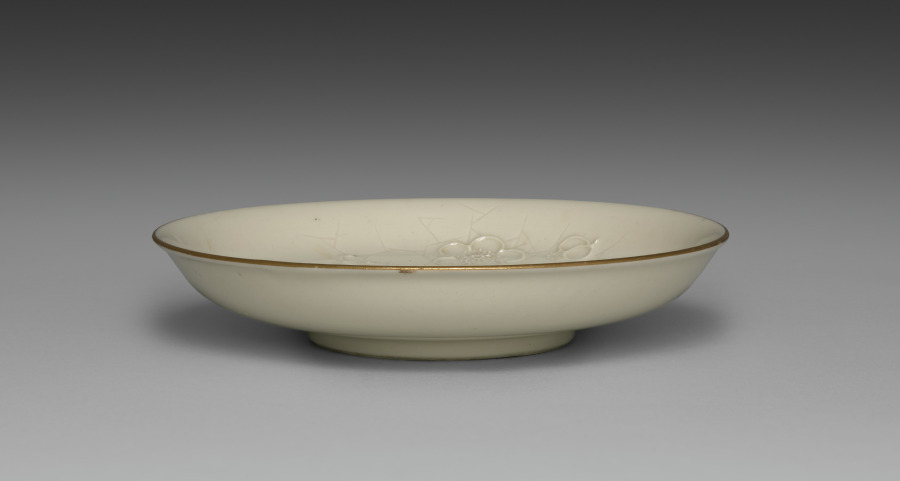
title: Medium-sized Dish from Dining Set with Plum Blossoms and Cracked-Ice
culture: Japan, Meiji period (1868–1912)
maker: Seifū Yohei II (Japanese, 1844–1878)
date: c. 1875–78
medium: Porcelain with molded designs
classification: Ceramic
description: Each item in this set has a delicate low-relief design of flowering plum branches over scattered, intersecting lines meant to resemble the cracked-ice surface of a frozen body of water and is signed on the base in gold pigment. While Yohei II produced many fine works in underglaze blue, like those produced by Kiyomizu Shichibei, he also made works in quite different styles later in his career, from the early 1870 s. In 1873, he was appointed purveyor to the Industrial Center of Kyoto Prefecture, a designation associated with Kyoto’s efforts to reach an international market through the port of Kobe; and from 1875 until his death, he was involved in national-level projects to present Japanese ceramics across the world. It was during this period that Yohei III was apprenticed to Yohei II, and it has been suggested that this set may in fact be an early example of Yohei III’s work, which he signed with his teacher’s name. Decorated with flowers resembling Japanese textile motifs, the set calls to mind the design of Yohei II’s pair of vases with plum blossoms in the Victoria and Albert Museum. Here, the elaborate trees created for a formal public exhibition setting have been translated into the approachable blossoms of the genteel domestic environment. While the designs are consistent across the pieces, each raised flower petal and pistil and each incised line in the ice was done by hand, so the cups, bowls, and dishes are similar yet unique. The bottoms of two boxes once identified the set’s owner, but the information has been deliberately obscured with black ink. However, inscriptions still visible appear to indicate two occasions, once at the end of July 1886 , and once again in June 1916 , when parts of the set were requested from Hokura in Niigata Prefecture. The location corresponds to a neighborhood in the present-day city of Jōetsu. The surname Tsuji 辻 also appears on a paper tag affixed to one of the box cloths. Future research may possibly reveal more about their provenance. A vase by Yohei III in a private collection combines the formal grandeur of the Yohei II vases in the Victoria and Albert Museum with the gentler design of this dining set, placing flowering plum trees against soft, scalloped-edge clouds resembling those in golden screens.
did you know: The dining wares have a creamy white coloration that the four boxes containing them identify as Korean in style.